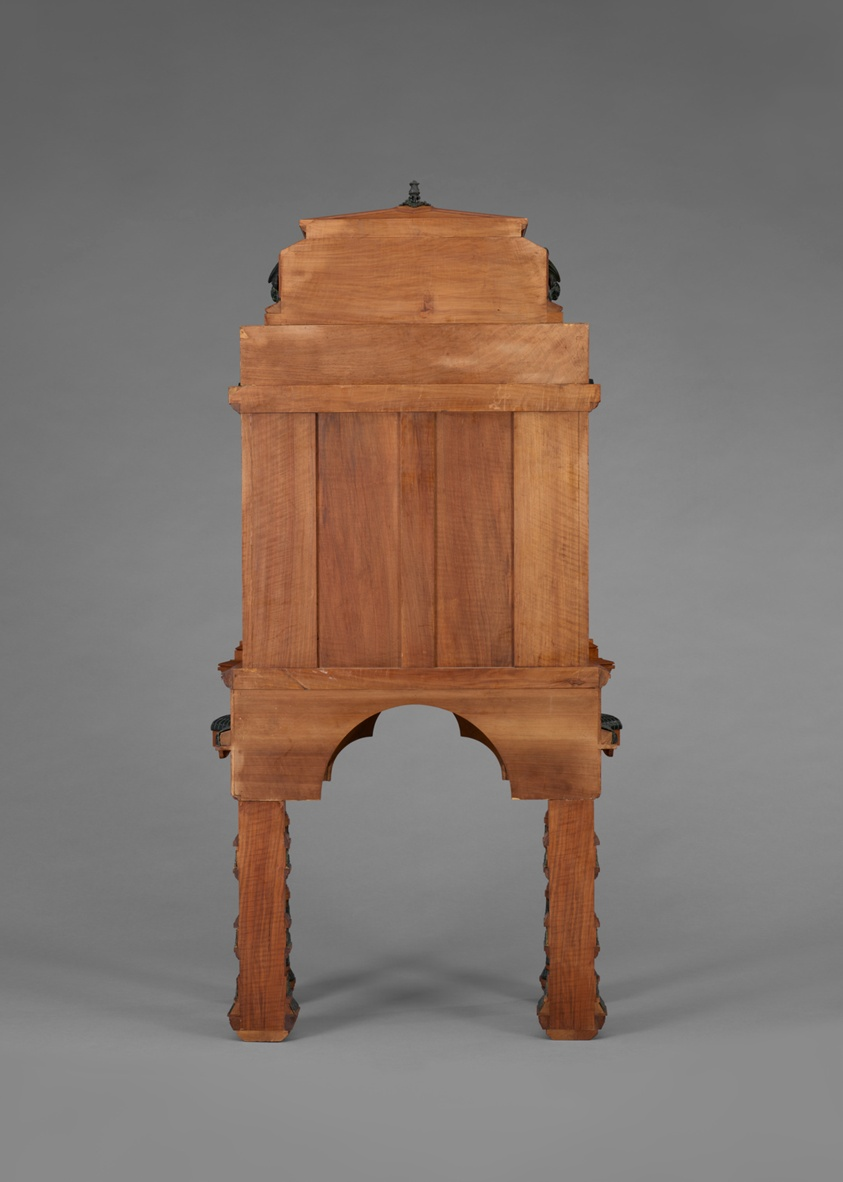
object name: Furniture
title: Cigar Cabinet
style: Neogothique, 19th century, gothic revival, merovingian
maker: Made by Charles-Guillaume Diehl (German, active in Paris, 1811–1885); Designed by Jean-Eugene Brandely (French, active 1867–1873); Bronzes modeled by Emmanuel Fremiet (French, 1824–1910); Paris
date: c. 1867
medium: Oak, cedar and walnut veneers, patinated bronze, and caning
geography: Paris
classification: furniture; humidor; european decorative arts; cabinet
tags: lizards, merovech, merovee, quatrefoil, smoking, cigars, tobacco